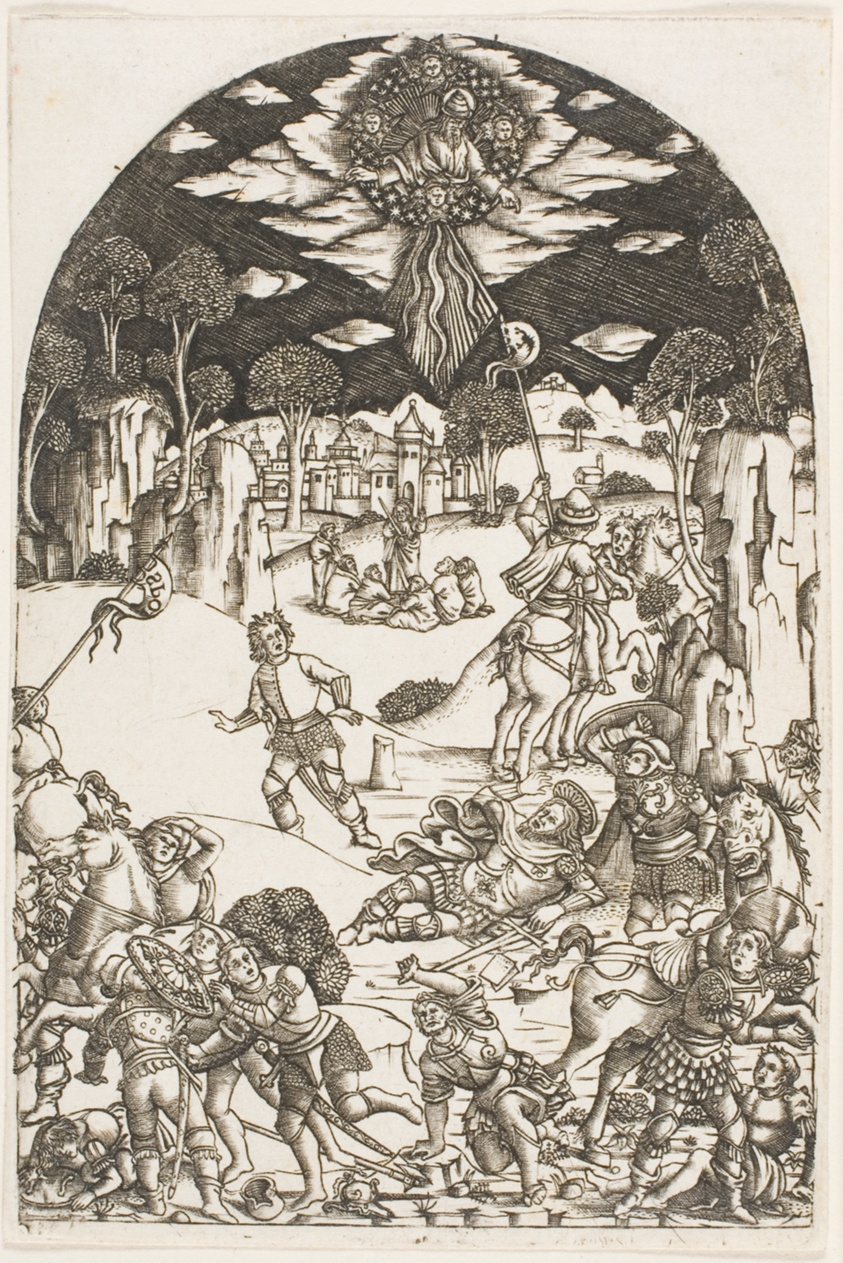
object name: Print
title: The Conversion of Saint Paul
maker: Unknown Artist; Italian, 15th century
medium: Engraving on paper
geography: Italy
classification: engraving; print; prints and drawing